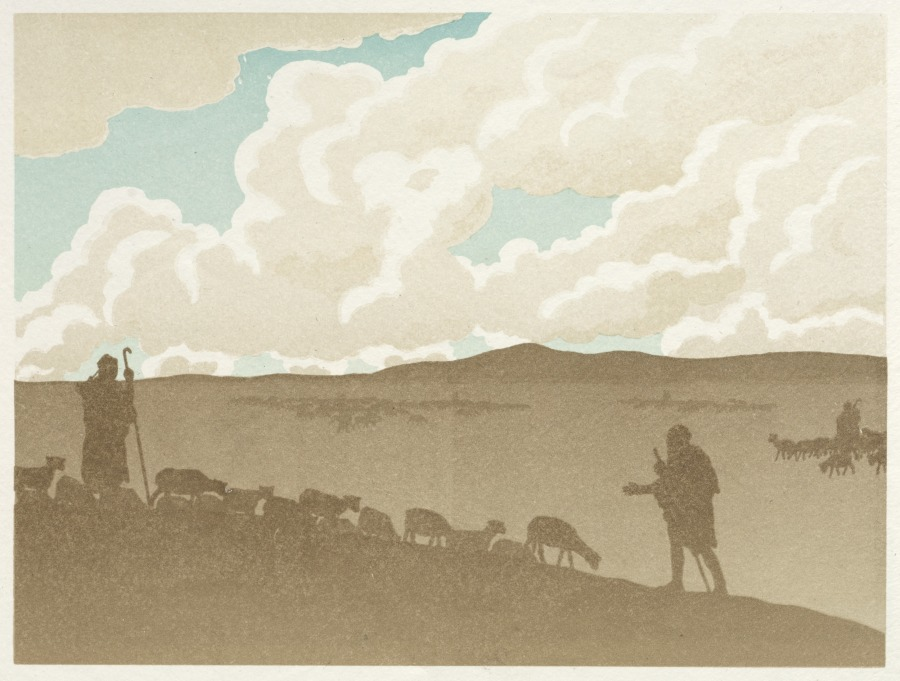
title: The Wandering Jew: The Plain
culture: France, 19th century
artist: Henri Rivière (French, 1864–1951)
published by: Verneau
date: 1896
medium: color lithograph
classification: Portfolio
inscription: title page is signed, in blue crayon: Henri Rivière